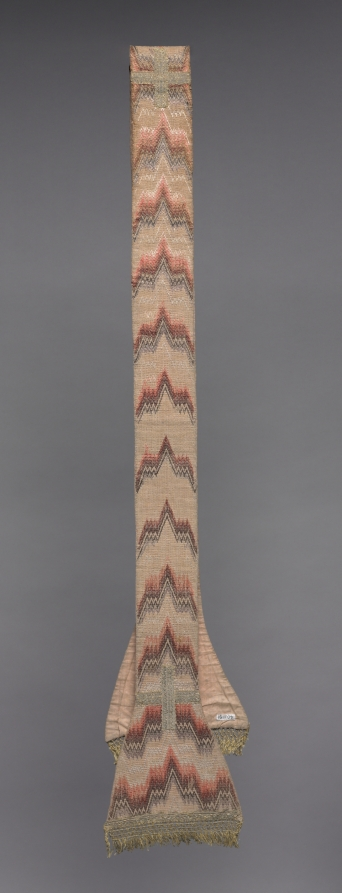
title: Embroidered Stole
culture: Italy, 19th century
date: 1800s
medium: bargello, silk on linen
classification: Embroidery